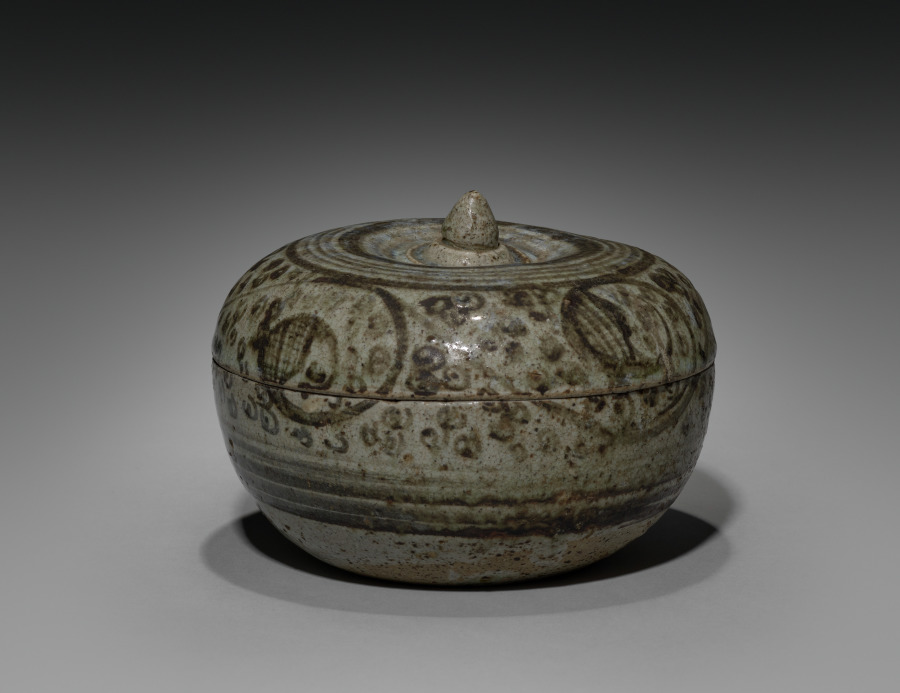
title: Covered Bowl with Painted Decoration with Lid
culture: Siam, Sawankhalok ware, 15th century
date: 1400s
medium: stoneware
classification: Ceramic